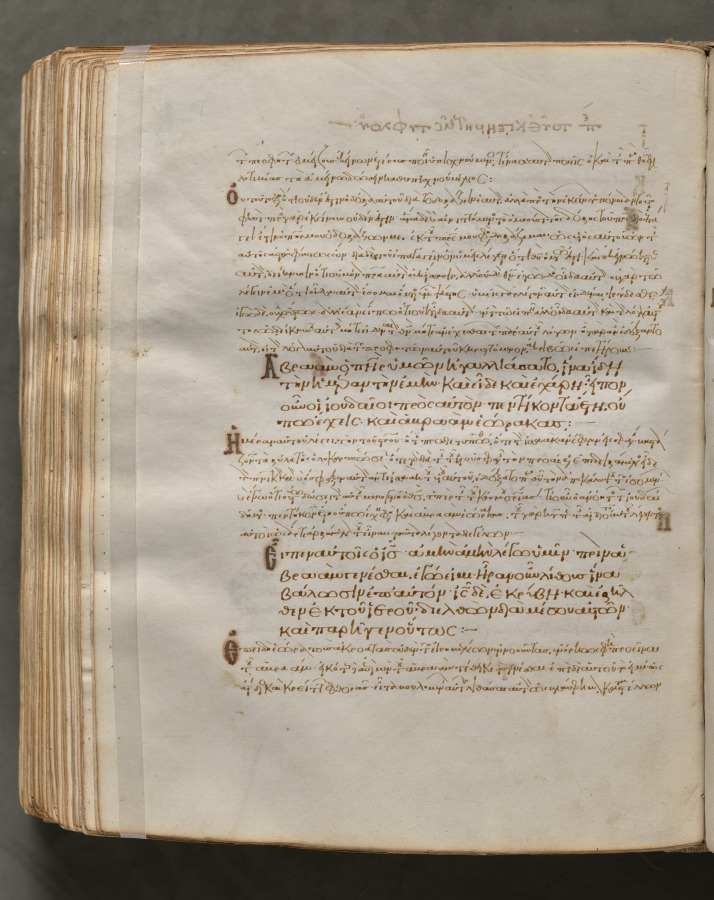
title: Text, folio 367 (verso), from a Gospel Book with Commentaries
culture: Byzantium, Constantinople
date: c. 1000–1100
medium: ink, tempera, and gold on vellum; leather binding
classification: Bound Volume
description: Each of the four gospels in this book opens on a page with brilliantly illuminated borders depicting the author of the text as well as birds—principally peacocks, symbols of the immortality of the soul—and fountains, representing the fountain of life and the salvation of the soul. This volume consists of 428 leaves with texts in Greek. Its level of sophistication suggests that it was probably written and decorated in a monastery in Constantinople.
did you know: Gospel books were carried in procession through Byzantine churches.